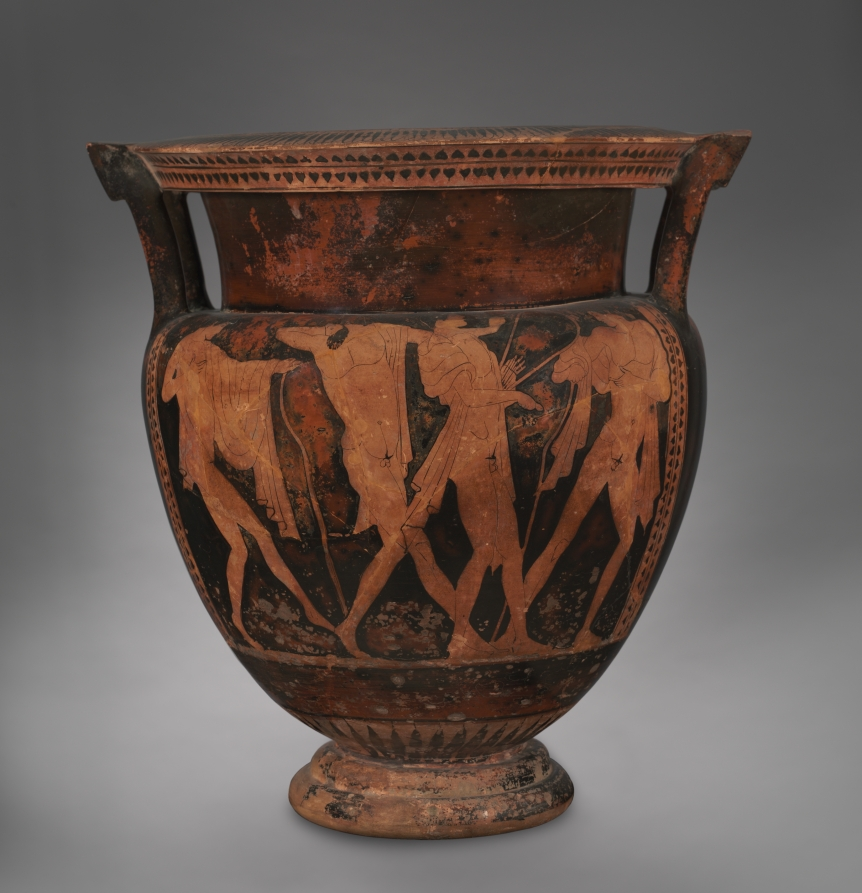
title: Red-Figure Column Krater (Mixing Vessel): Apollo and Goddesses with Chariot (A); Komos (Revel) (B)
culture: Greek, Attic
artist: attributed to Cleveland Painter (name vase; Greek, Attic, active c. 470–460 BCE)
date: c. 470–460 BCE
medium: ceramic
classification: Ceramic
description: Since this column-krater is the most important of 12 vases painted by a Greek artist whose name is unknown, the great English vase expert, Sir John D. Beazley, named him (or her) the Cleveland Painter, after our city. Other vases by the Cleveland Painter are now in New York, Vienna, Paris, and Copenhagen, as well as museums in Greece and Italy. The chariot scene on the main side of the vessel is a divine one, as indicated by the presence of Apollo, identified by his lyre and laurel wreath. With him are three goddesses, probably his sister Artemis (facing him), together with Hera (wearing a crown and holding a scepter and libation dish), and Hebe, the daughter of Zeus and Hera, on her way to meet her future husband, Herakles.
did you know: The revelers on this vessel dance to the music of the barbiton, a stringed instrument associated with leisure and luxury.